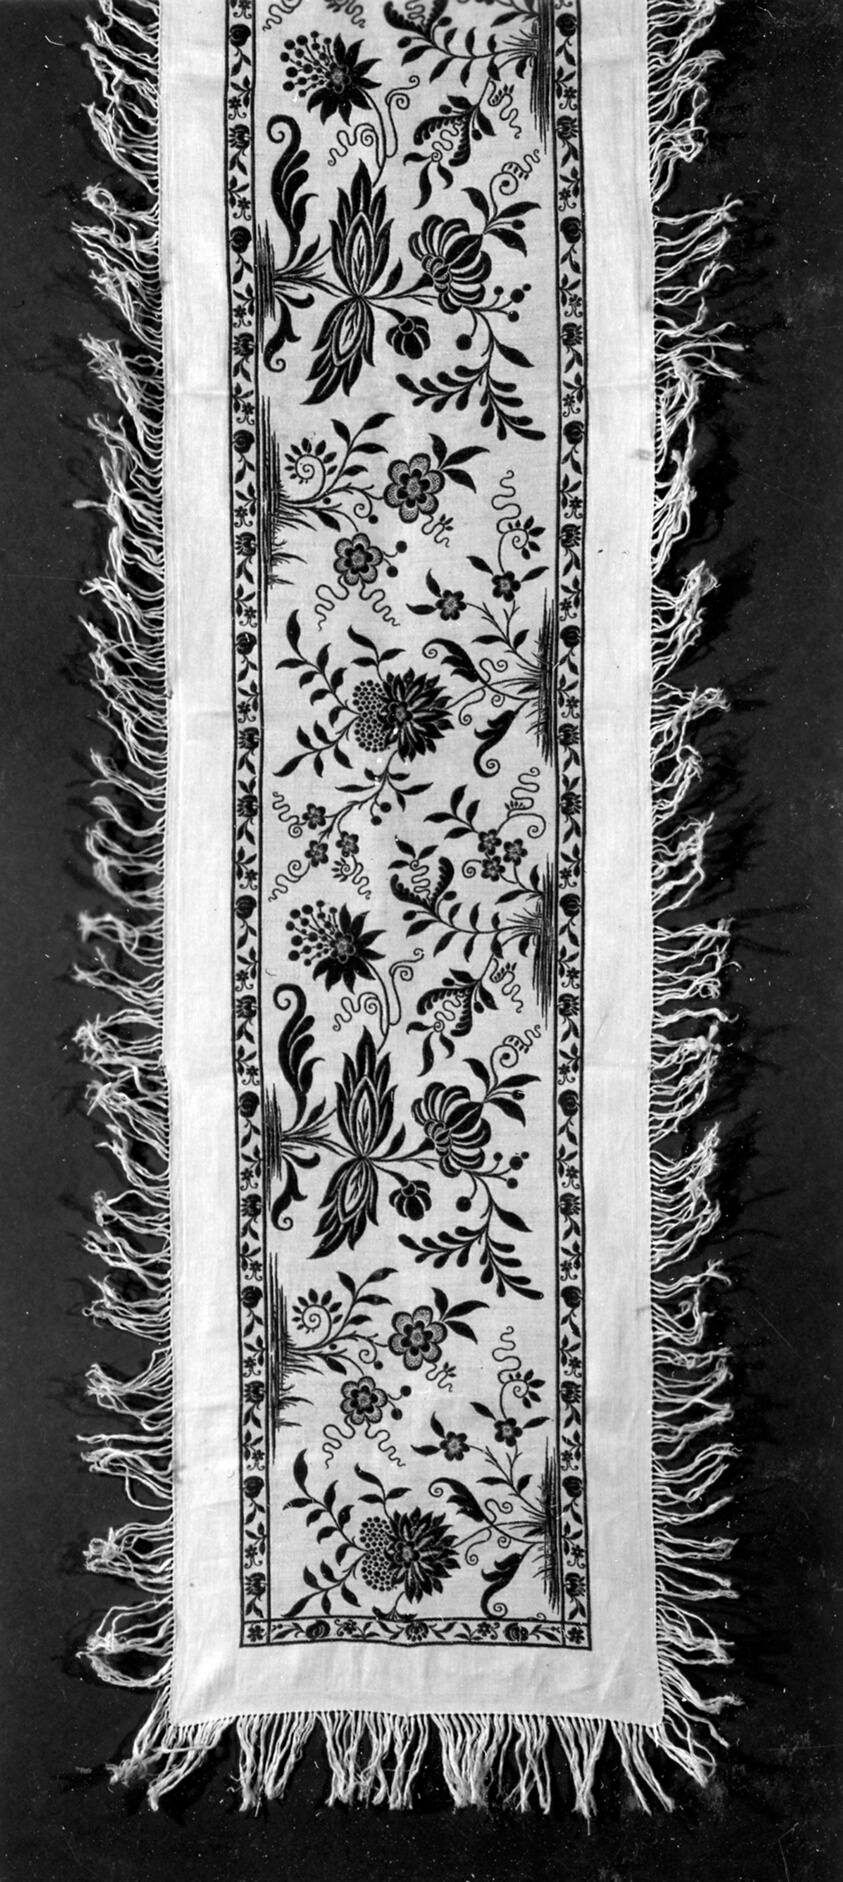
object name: Textile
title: Table Runner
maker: Russia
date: 1875/1900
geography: Russia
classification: textile; weaving